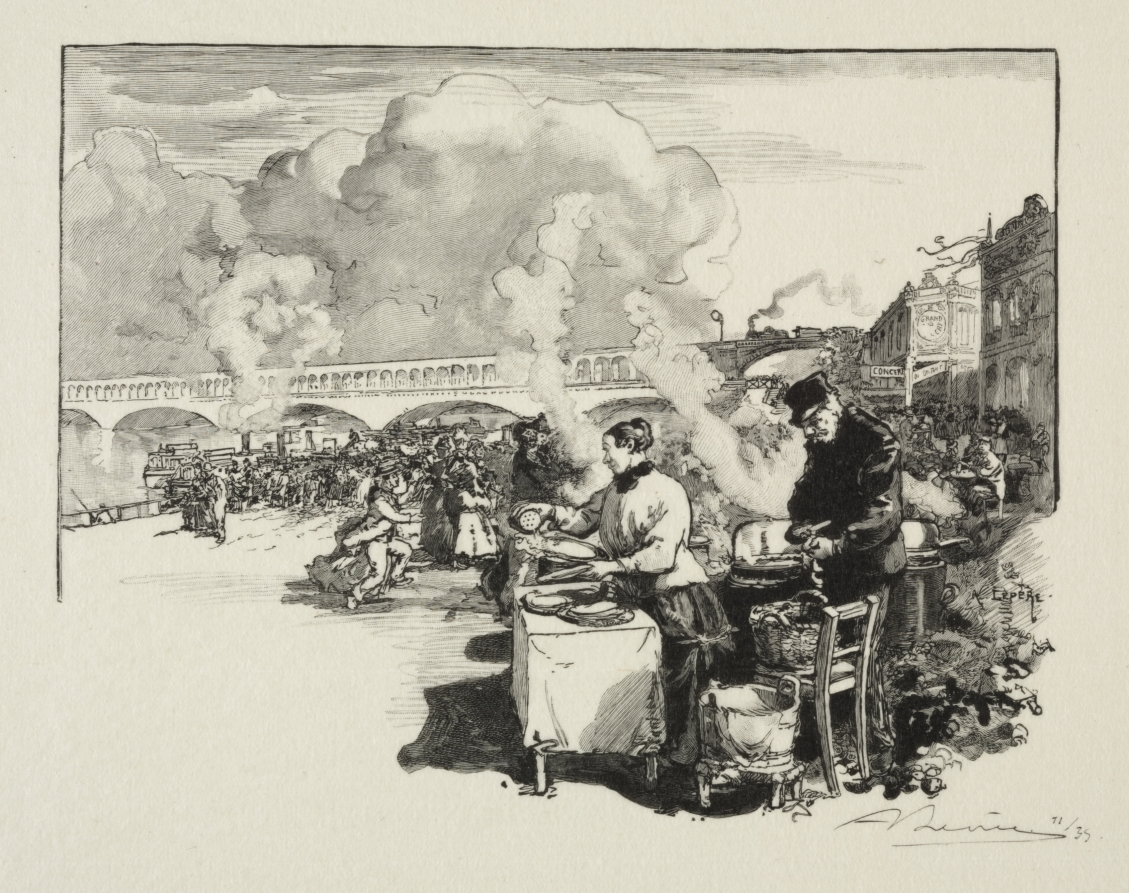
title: Debarcadère des bateaux-omnibus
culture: France, 19th-20th century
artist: Auguste Louis Lepère (French, 1849–1918)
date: 1886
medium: wood engraving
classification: Print